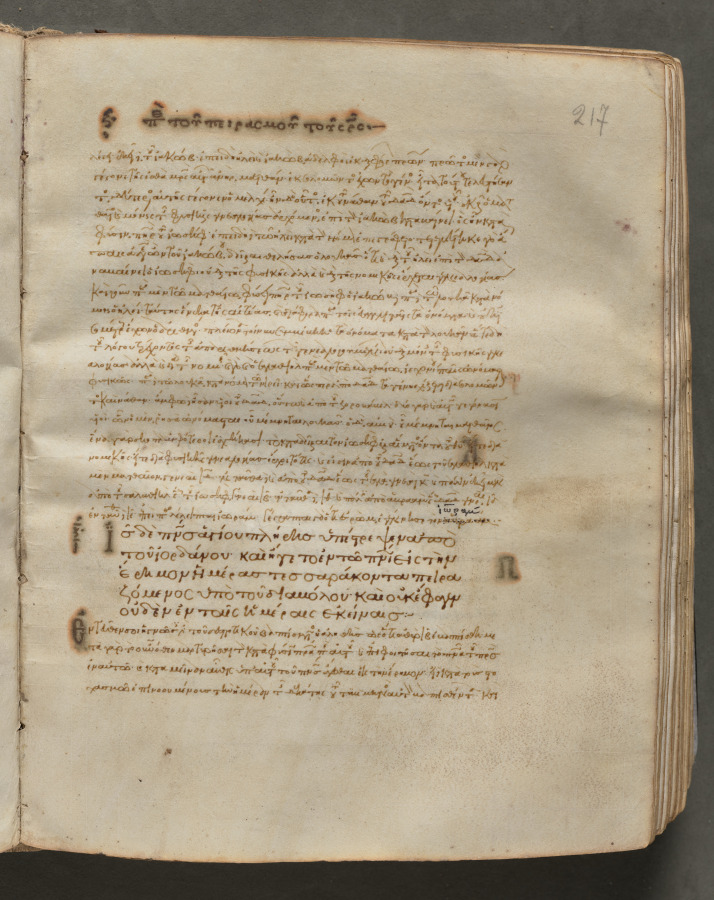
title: Text, folio 217 (recto), from a Gospel Book with Commentaries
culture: Byzantium, Constantinople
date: c. 1000–1100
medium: ink, tempera, and gold on vellum; leather binding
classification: Bound Volume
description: Each of the four gospels in this book opens on a page with brilliantly illuminated borders depicting the author of the text as well as birds-principally peacocks, symbols of the immortality of the soul-and fountains, representing the fountain of life and the salvation of the soul. This volume consists of 428 leaves with texts in Greek. Its level of sophistication suggests that it was probably written and decorated in a monastery in Constantinople.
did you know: Gospel Books were carried in procession through Byzantine churches.